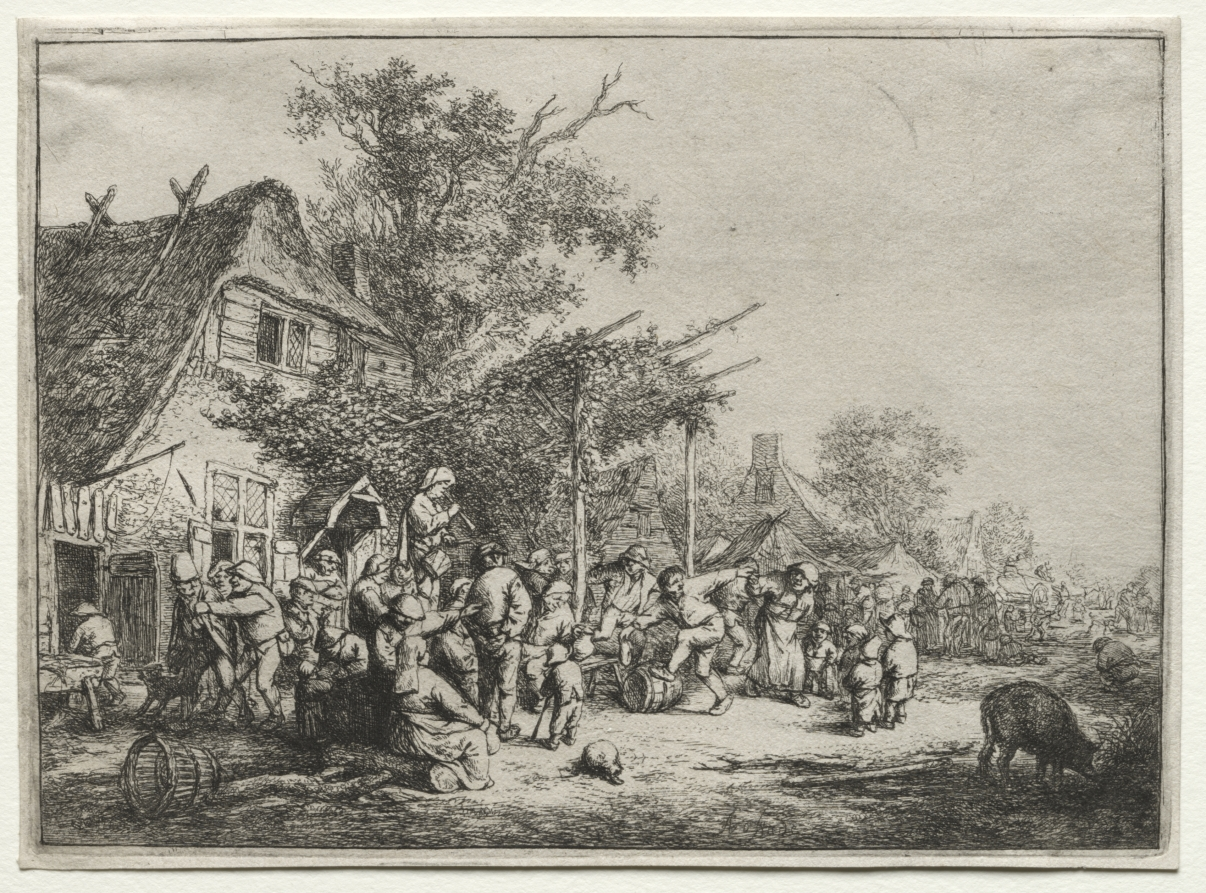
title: Festival Under the Trellis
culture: Netherlands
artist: Adriaen van Ostade (Dutch, 1610–1684)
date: c. 1653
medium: etching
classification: Print